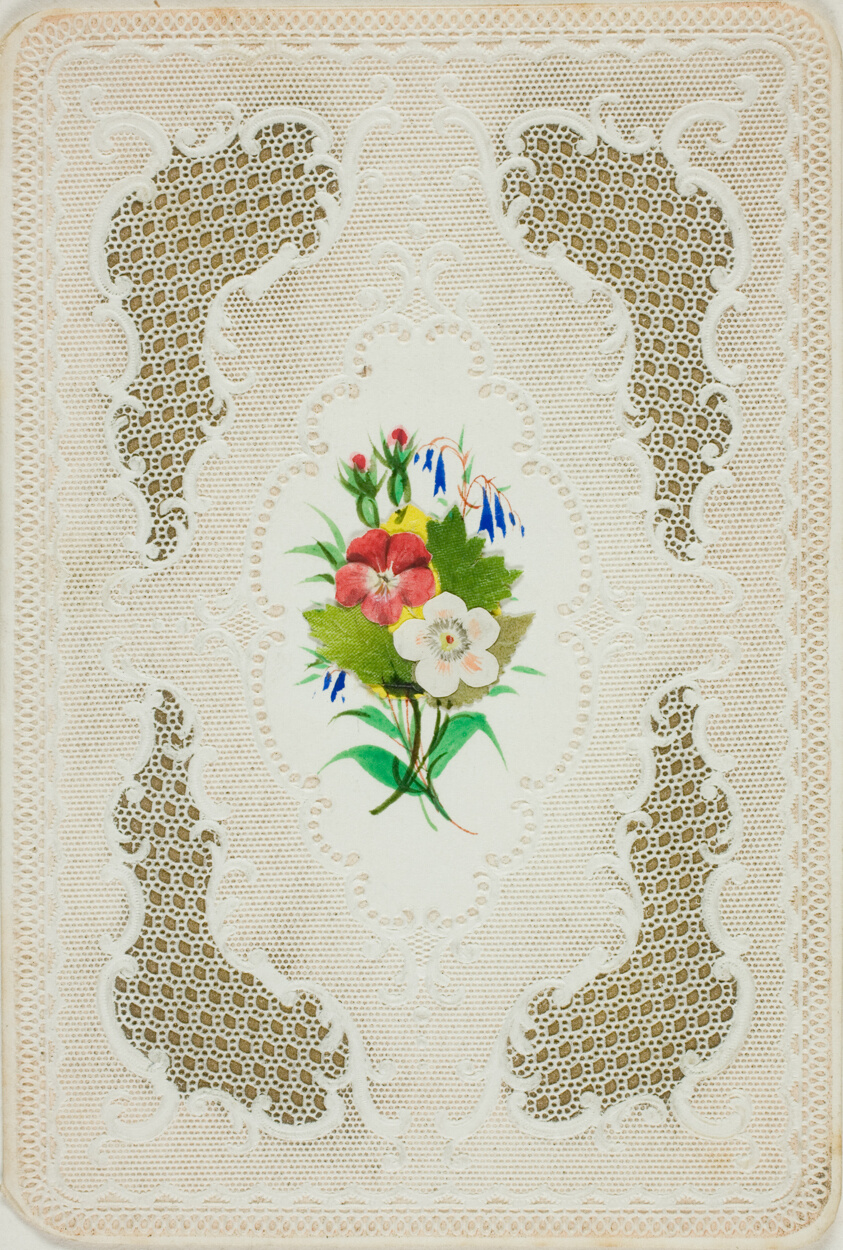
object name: Drawing and Watercolor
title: Untitled Valentine (Red and White Flowers)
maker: Unknown Artist; English, 19th century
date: c. 1850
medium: Collaged elements and watercolor on gold accented and embossed ivory wove paper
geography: England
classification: valentine; prints and drawing; paper